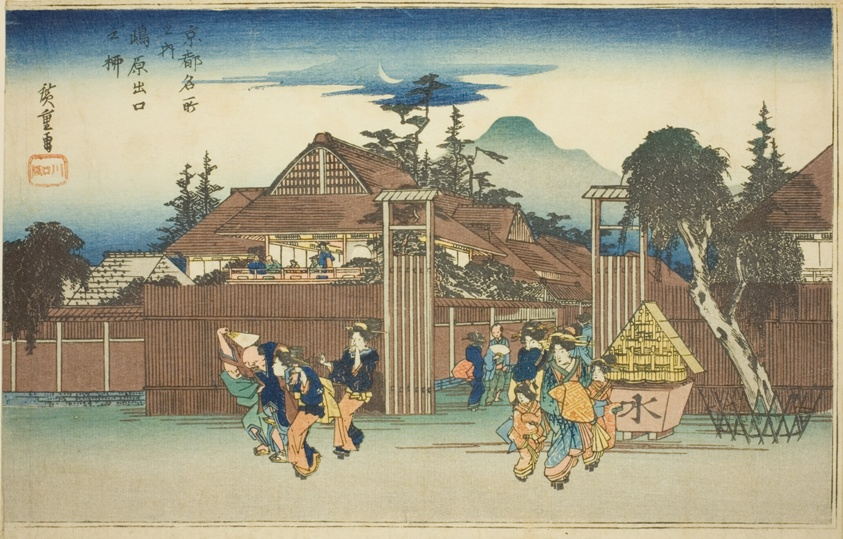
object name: Print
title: The Willow Tree at the Gate of Shimabara Pleasure Quarter (Shimabara deguchi no yanagi), from the series “Famous Views of Kyoto (Kyoto meisho no uchi)"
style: Japanese (culture or style)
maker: Utagawa Hiroshige 歌川 広重; Japanese, 1797-1858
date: c. 1834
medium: Color woodblock print; oban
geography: Japan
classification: woodblock print; print; asian art